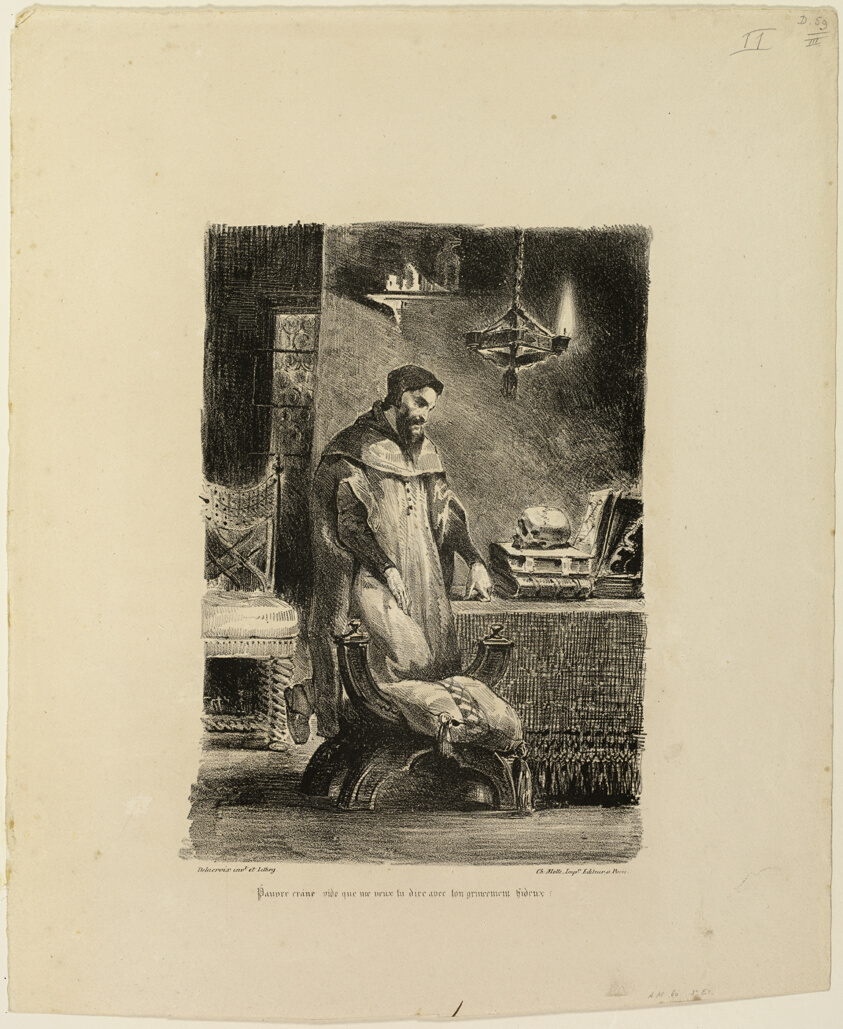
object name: Print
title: Faust in His Study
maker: Eugène Delacroix (French, 1798-1863)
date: 1828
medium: Lithograph in black on ivory wove paper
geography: France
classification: lithograph; print; prints and drawing